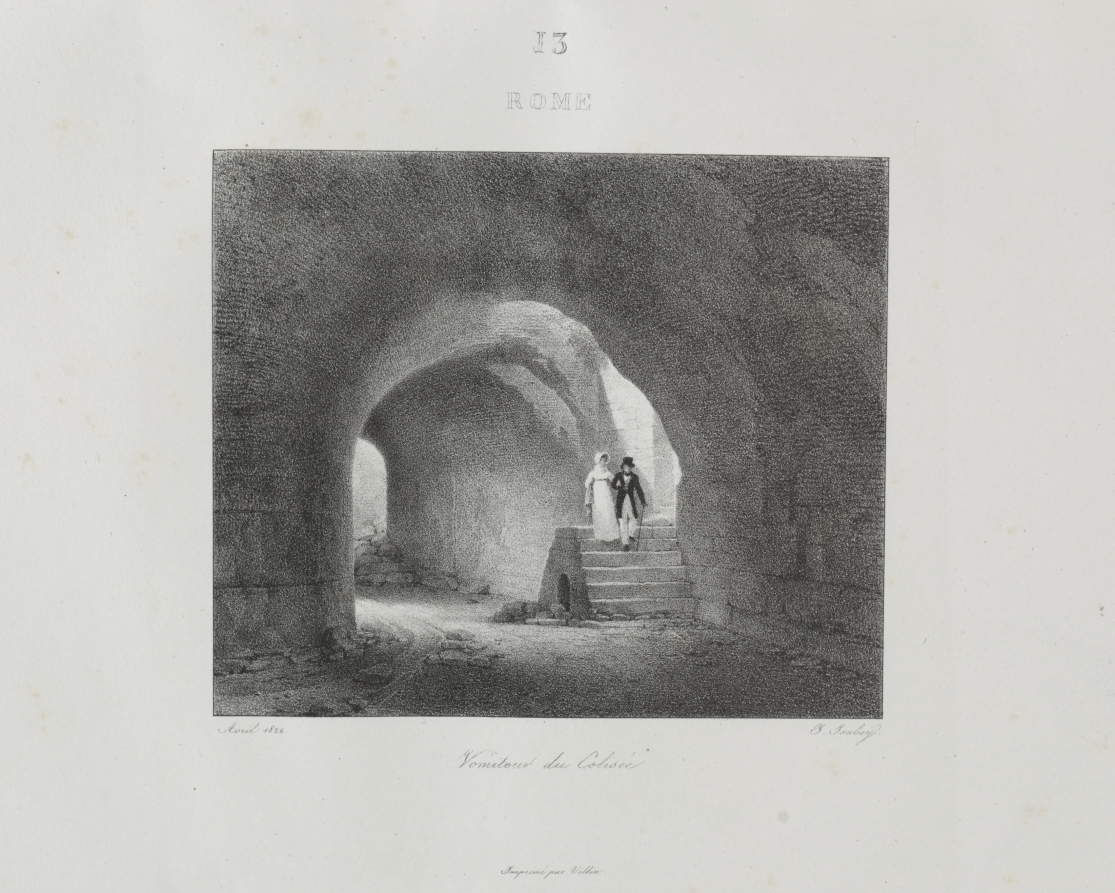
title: Voyage en Italie en 1822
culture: France, 19th century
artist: Jean-Baptiste Isabey (French, 1767–1855)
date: 1833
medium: lithograph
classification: Bound Volume